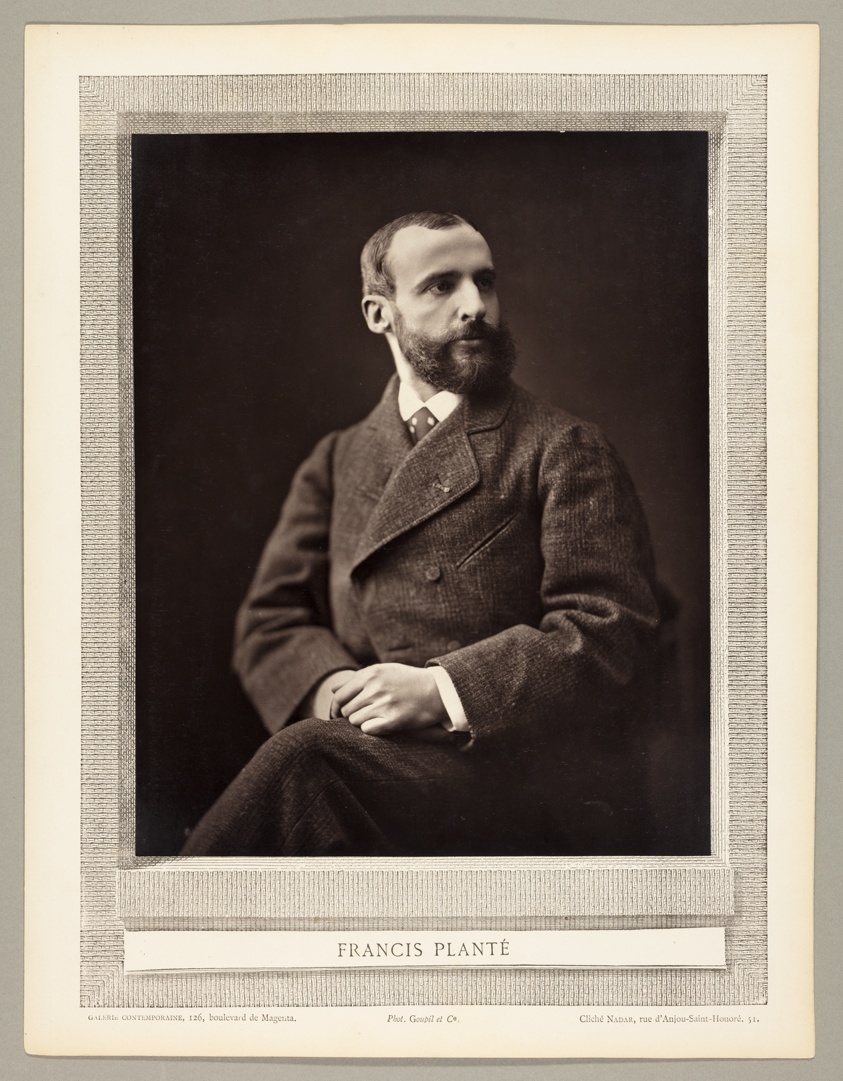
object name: Photograph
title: Francis Planté (French pianist, 1839-1934)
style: 19th century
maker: Nadar (Gaspard Félix Tournachon) (French, 1820–1910)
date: 1865/73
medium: Woodburytype, from the periodical “Galerie Contemporaine Littéraire, Artistique” (1878), volume 5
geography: France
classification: woodburytype; photomechanical process; photography; photograph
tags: Collected by Hugh Edwards, Contemporaine Littéraire